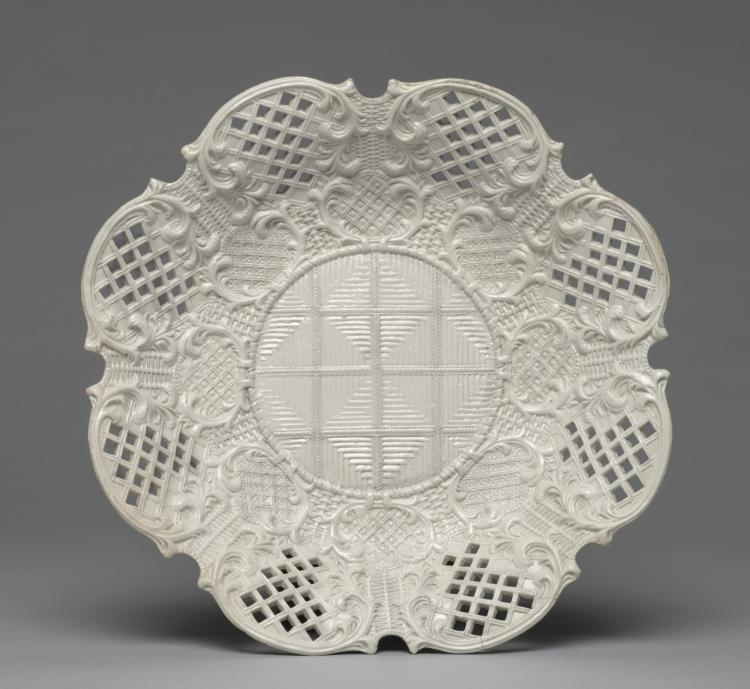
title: Plate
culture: England, Staffordshire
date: c. 1760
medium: salt-glazed stoneware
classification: Ceramic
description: This plate’s glossy texture was created by throwing salt into a kiln during the hottest point of the firing process. During the 1700s, salt-glazed dishes proved to be a popular substitute for porcelain because of their versatility, durability, and affordability. This particular plate features intricate basket weave patterns, decorative frames, and scalloped edges which were made by hand-pressing clay into a mold.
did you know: The three-dimensional designs on this plate are similar to both silver and straw baskets produced during the mid-1700s.